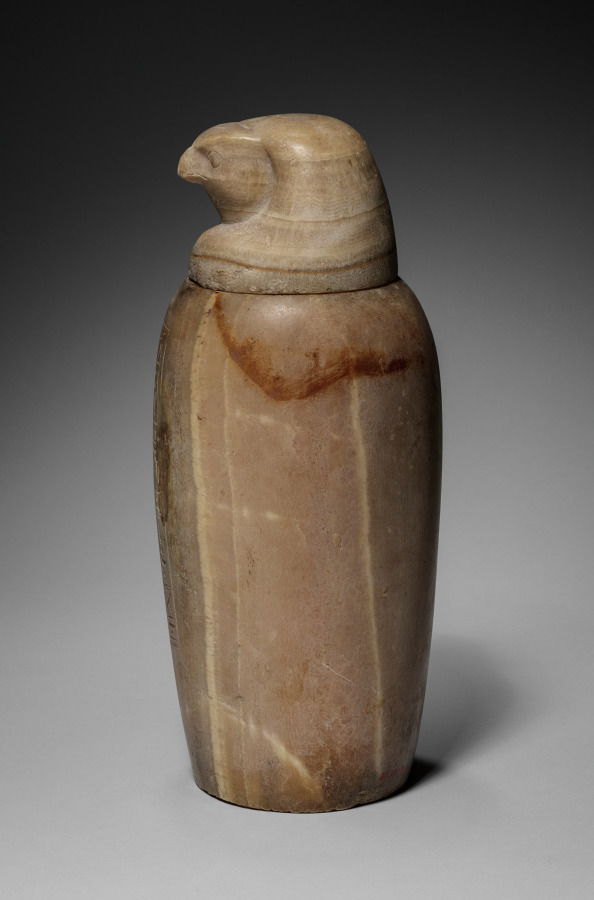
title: Canopic Jar with Falcon's Head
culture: Egypt, Late period (715–332 BCE), Dynasty 26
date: 664–525 BCE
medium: travertine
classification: Funerary Equipment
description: In the process of mummification, the liver, lungs, stomach, and intestines were removed, separately embalmed, and stored in specialized jars known as canopic jars (after a sailor in Greek mythology, who died at the town of Canopus in the Nile Delta and was worshipped there in the form of a human-headed jar). Each organ was identified with one of four funerary deities collectively known as the Sons of Horus: the liver with Imsety (man's head), the lungs with Hapy (baboon's head), the stomach with Duamutef (jackal's head), and the intestines with Qebehsenuef (falcon's head). It was their duty to protect the deceased and restore to him his body parts in the hereafter.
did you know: The falcon-headed deity Qebehsenuef protected the contents of this canopic jar. It contained the remains of the deceased's intestines, which were kept safe for the afterlife.